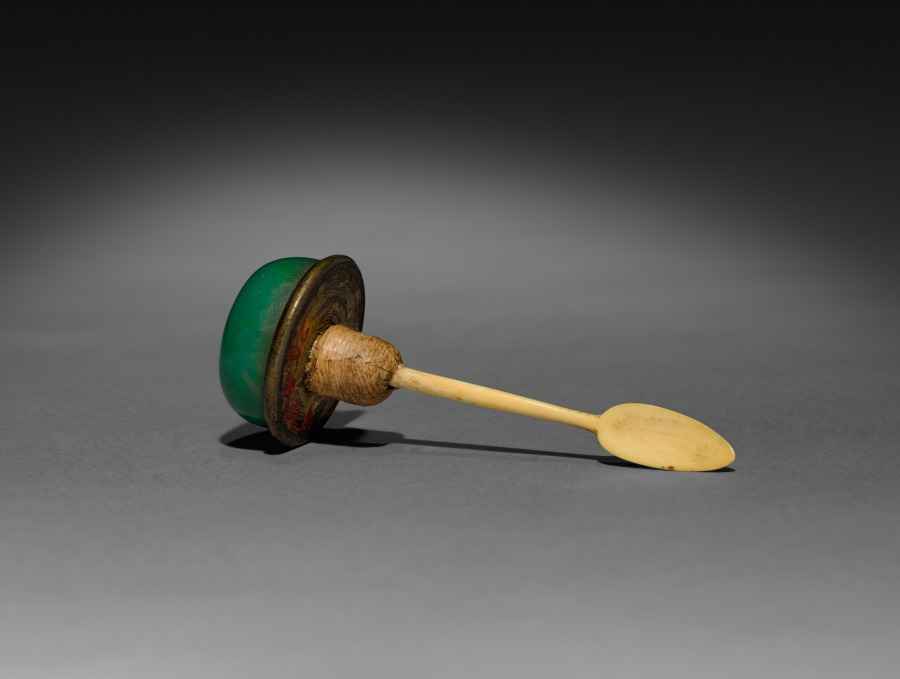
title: Snuff Bottle (stopper)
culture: China, Qing dynasty (1644-1911)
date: 1644–1911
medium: glass and jade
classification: Glass